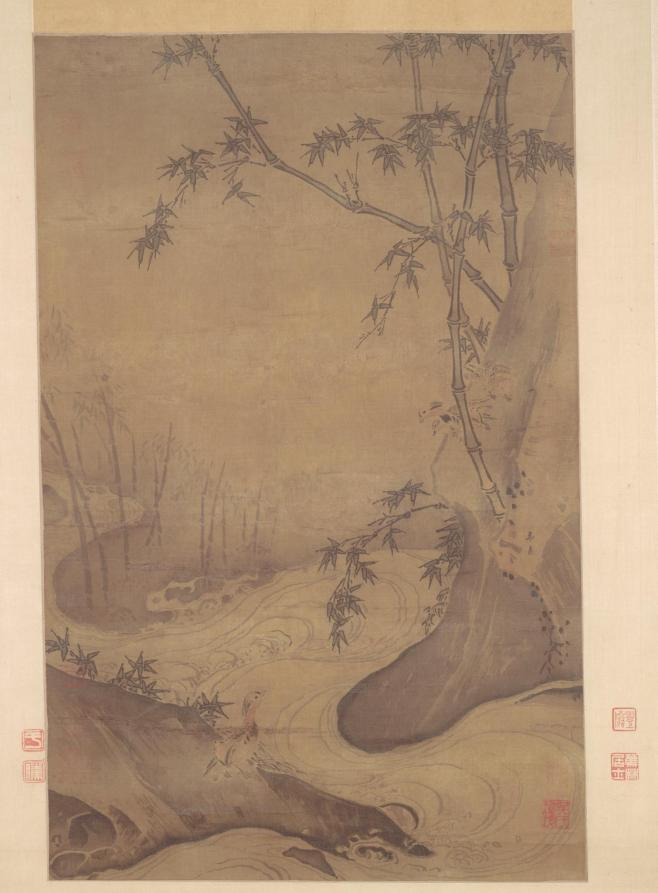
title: Bamboo and Ducks by a Rushing Stream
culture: China, Southern Song dynasty (1127–1279)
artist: Ma Yuan (Chinese, c. 1150–after 1255)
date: 1127–1279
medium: hanging scroll; ink and light color on silk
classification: Painting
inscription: 馬遠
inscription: 12 additional seals: 1 of An Kuo (1481–1534); 7 of Hsiang Yüan-pien (1525–1590); 2 of Liang Ch'ing-piao (1620–1691); 2 unidentified. (WKH)